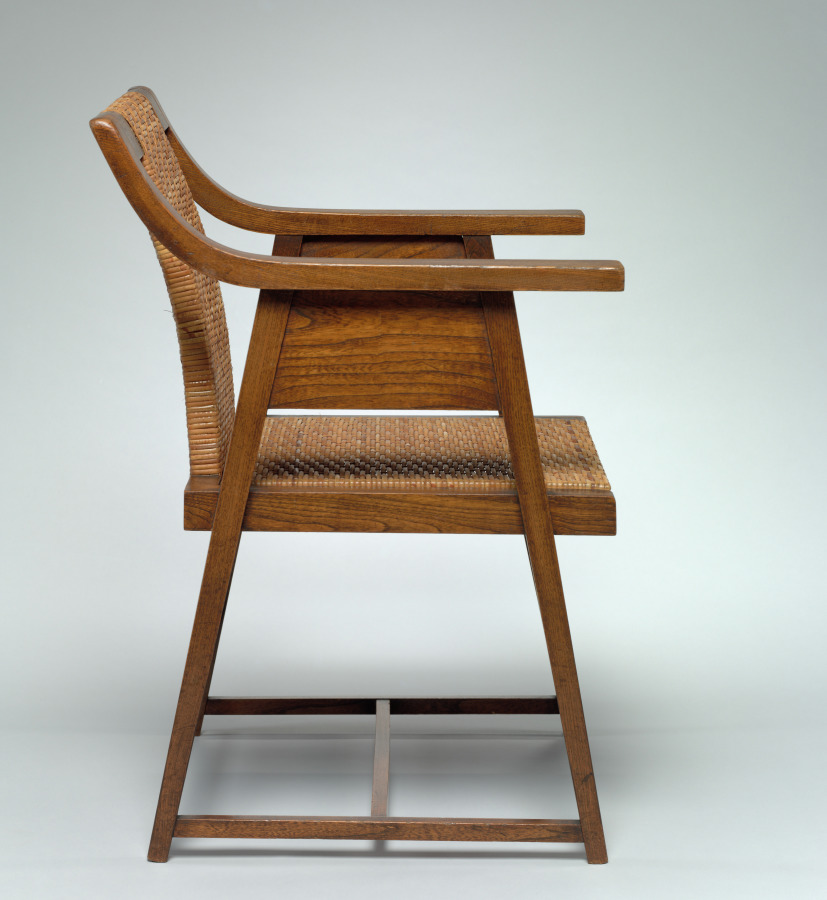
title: Armchair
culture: Austria, Vienna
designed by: Hans Vollmer (Austrian, 1879-)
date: c. 1904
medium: oak with replacement upholstered slip seat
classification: Furniture and woodwork